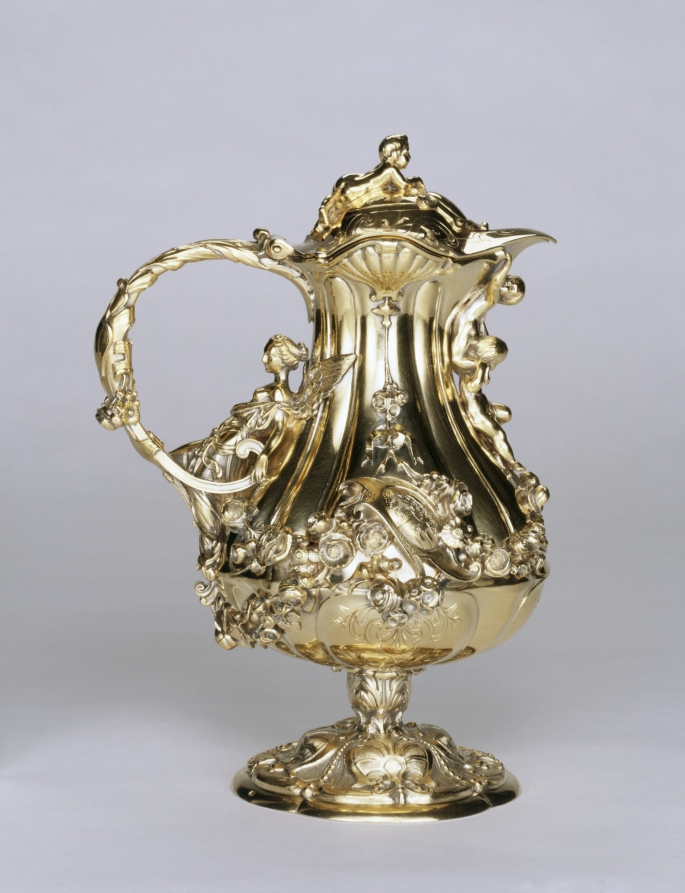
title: Covered Jug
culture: France, 19th century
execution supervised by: Jean-Valentin Morel (French, 1794–1860)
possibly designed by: Jules Dieterle (French, 1811–1889)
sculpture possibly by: Jules Klagmann (French, 1810–1867)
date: c. 1845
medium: gilded silver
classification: Silver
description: The elegance and richness of this ewer demonstrate the high level of technical mastery achieved by its maker. Morel studied under his father, a Parisian lapidary (someone who cuts, polishes, and engraves hard stones), and with Adrien Vachette, a maker of gold boxes. In 1842 he went into partnership with Charles-Edmond Duponchel, which lasted until the late 1840s, at which time he established himself in London, remaining there until 1852, when he returned to Paris. Morel frequentlyfollowed the designs of others, and it has been suggested that in the case of this pitcher his well-known contemporary, Jules Dieterle (1811-1889), may have conceived the overall form. The female figure seems to have been based on a design by the sculptor Jules Klagmann (1810-1867).